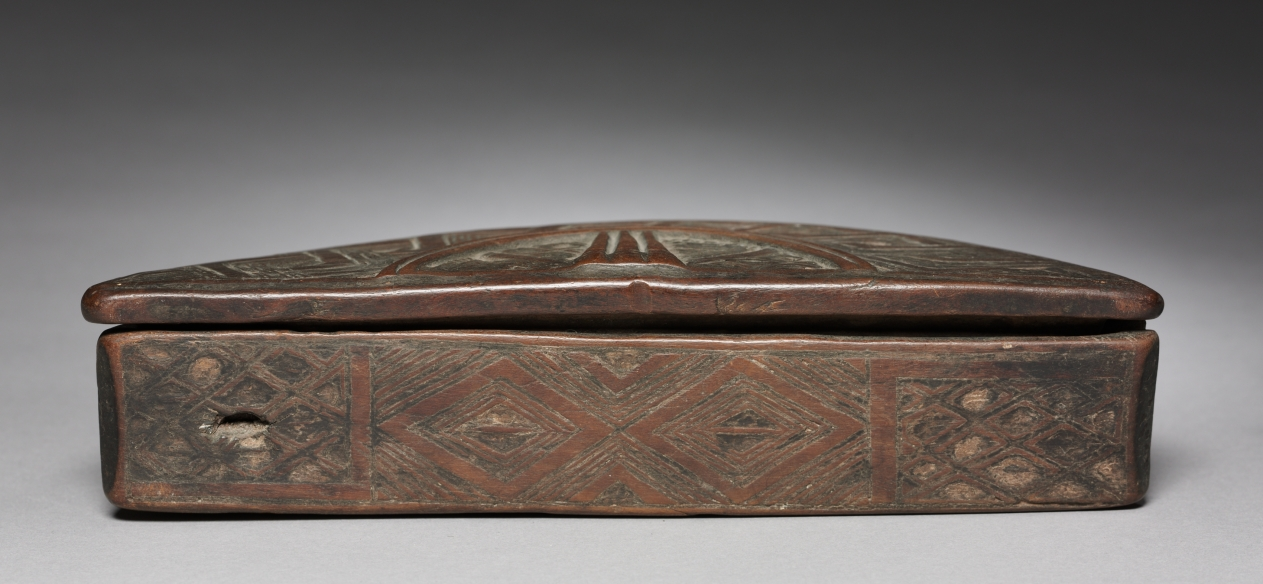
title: Box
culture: Africa, Central Africa, Democratic Republic of the Congo, Kuba-style maker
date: early 1900s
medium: Wood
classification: Vessels